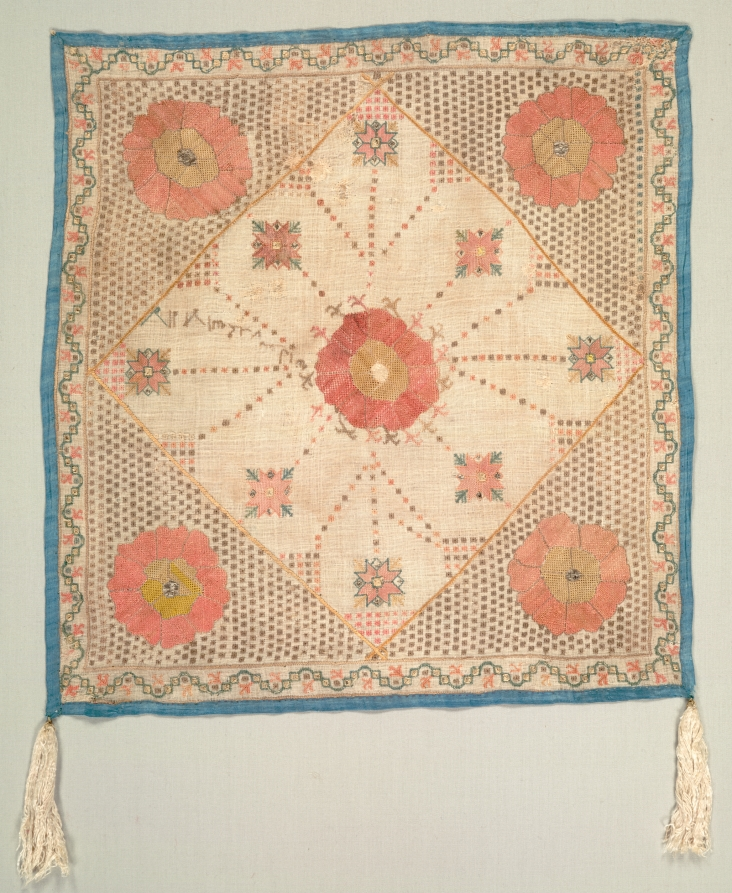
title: Embroidered Square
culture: Turkey, 19th century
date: 19th century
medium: embroidery: silk and metallic threads on linen tabby ground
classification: Embroidery